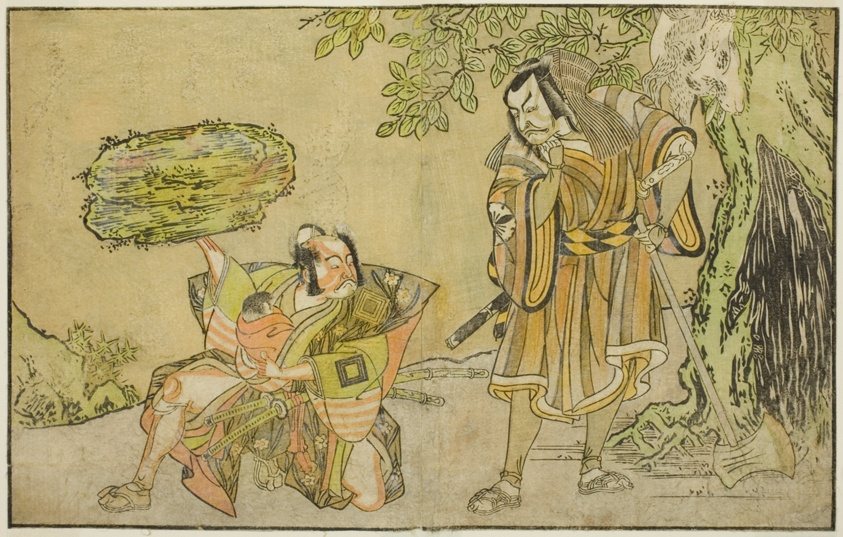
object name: Print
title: The Actors Matsumoto Koshiro II as Osada no Taro Kagemune Disguised as the Woodcutter Gankutsu no Gorozo (right), and Ichikawa Danzo III as I no Hayata Tadazumi (left), in the Play Nue no Mori Ichiyo no Mato, Performed at the Nakamura Theater in the Eleventh Month, 1770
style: Japanese (culture or style)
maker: Katsukawa Shunsho 勝川 春章; Japanese, 1726-1792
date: c. 1772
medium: Color woodblock print; from the illustrated book Yakusha Kuni no Hana (Prominent Actors of Japan)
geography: Japan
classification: woodblock print; print; asian art